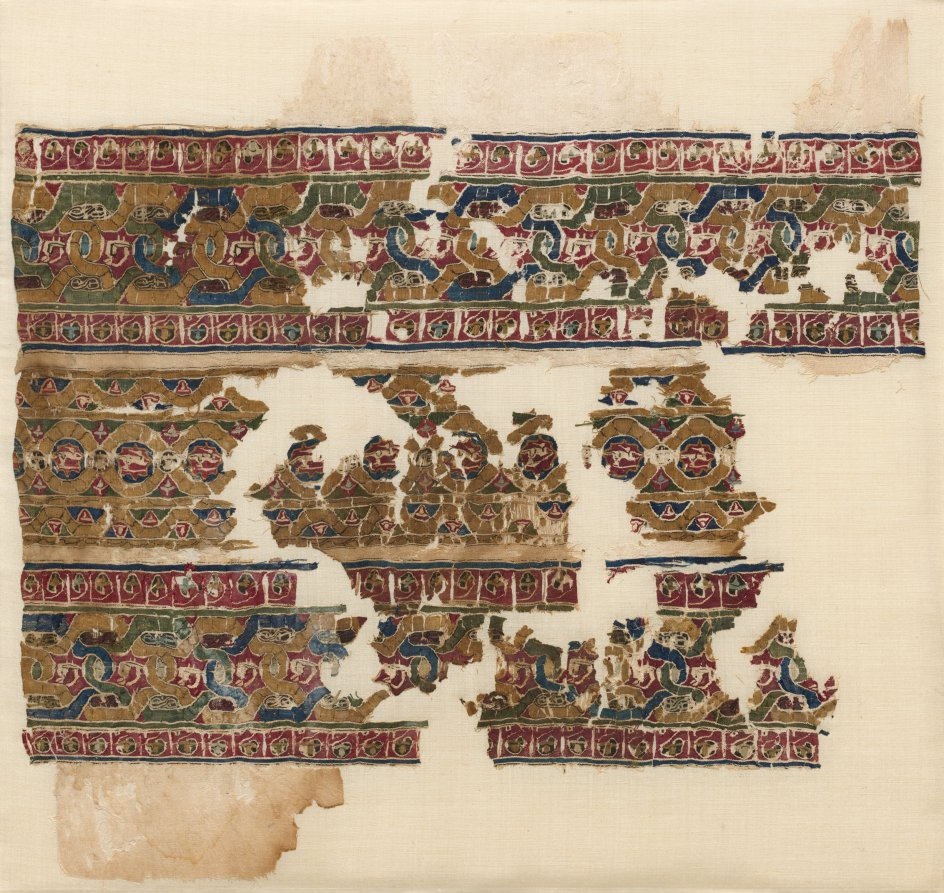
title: Tiraz with guilloche bands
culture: Egypt, Fatimid period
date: 1075–1125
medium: plain weave with inwoven tapestry weave: linen and silk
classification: Textile